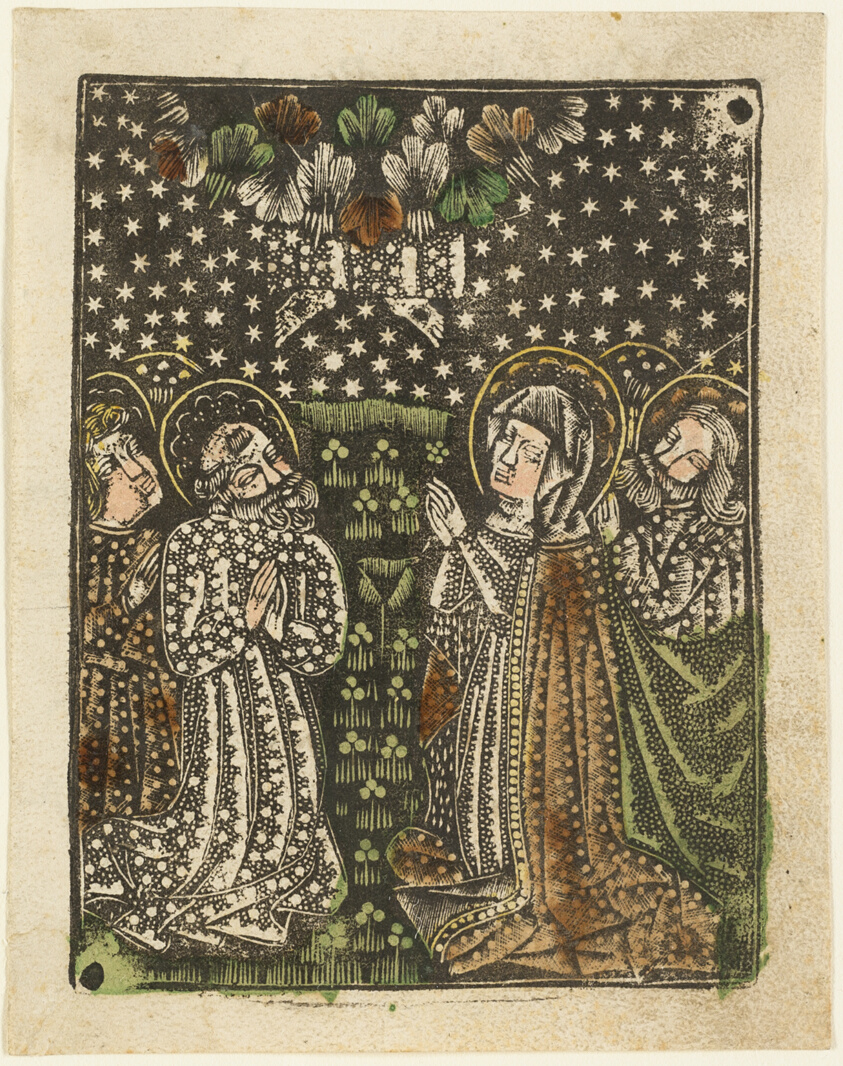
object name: Print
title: The Ascension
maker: Artist unknown; Bavarian, 15th century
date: 1460–65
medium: Metalcut in black hand colored with brush and watercolor in yellow, red-brown lake, and green, on ivory laid paper, with manuscript text in pen and brown ink on verso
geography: Germany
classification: dotted/metal cut; book; prints and drawing; print